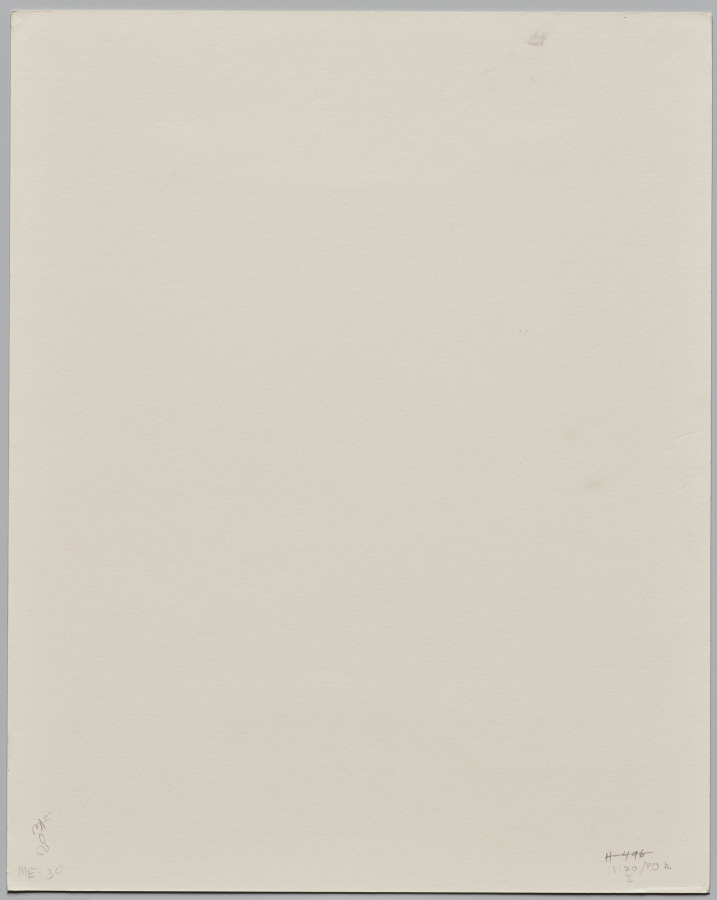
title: View of Karnak Temple, Hypostyle Hall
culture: Germany, 19th century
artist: Wilhelm Hammerschmidt (German, 1869)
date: c. 1880s-90s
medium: albumen print from wet collodion negative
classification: Photograph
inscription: Inscribed in black on recto: “W. Hammerschmidt N. 48"